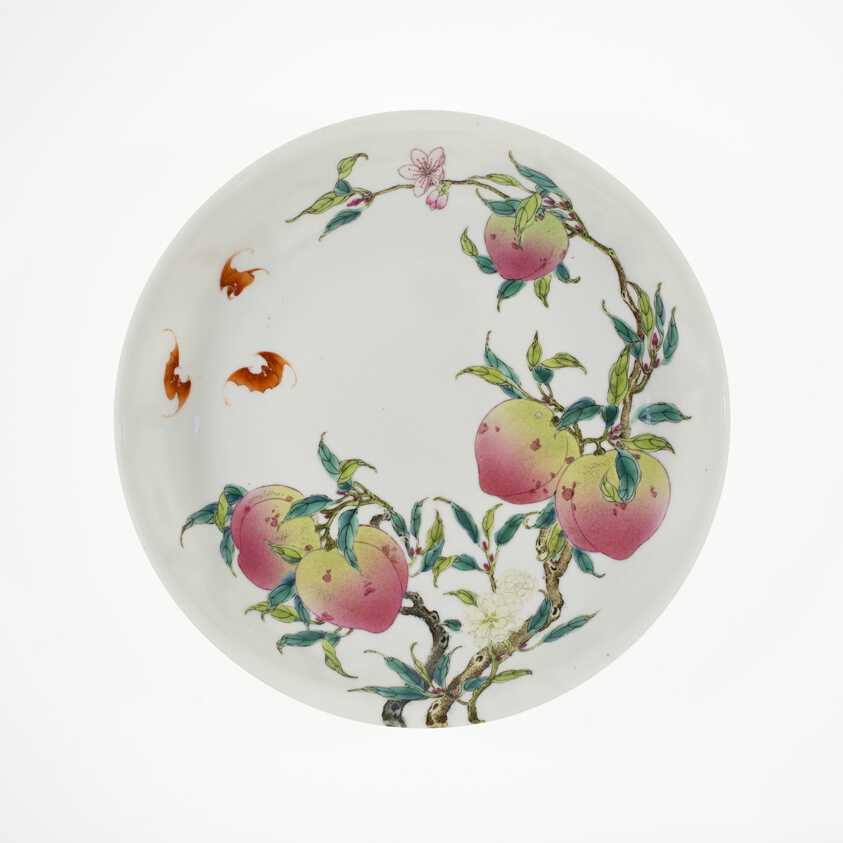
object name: Vessel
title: Dish with Fruiting Peaches, Tree Peony, Flowering Plum, and Bats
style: Chinese (culture or style)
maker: China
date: Qing dynasty (1644–1911), apocryphal Yongzheng mark (1723–1735), probably 19th century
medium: Porcelain painted in overglaze famille rose enamels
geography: China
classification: dish (vessel); porcelain; ceramics; asian art; vessel